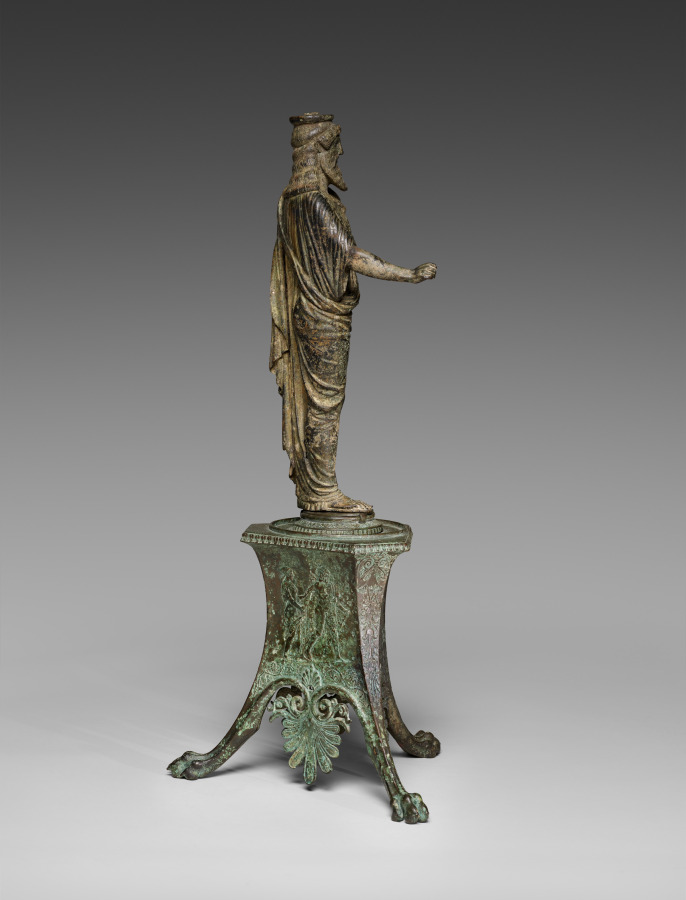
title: Statuette of Dionysos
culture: Italy, Roman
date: 50 BCE–50 CE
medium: bronze and silver and traces of gilding, hollow cast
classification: Sculpture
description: This bronze figure of Dionysos, the god of wine, theater, and the mysteries, is presented in a style recalling Archaic Greek art, most noticeably in his stiff pose and trimmed beard. The more naturalistic folds of his garment speak to a later date, in the Roman period. The disk attached at the top of the head suggests that this figure was once part of an ornate piece of furniture, perhaps a stand or support. In his right hand, the god likely held a kantharos or other attribute. He would have been further embellished with inlaid copper (lips), silver (whites of eyes), and perhaps gilding (garment).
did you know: Over his long, thin garment, Dionysos wears an animal skin, fastened on his left shoulder.